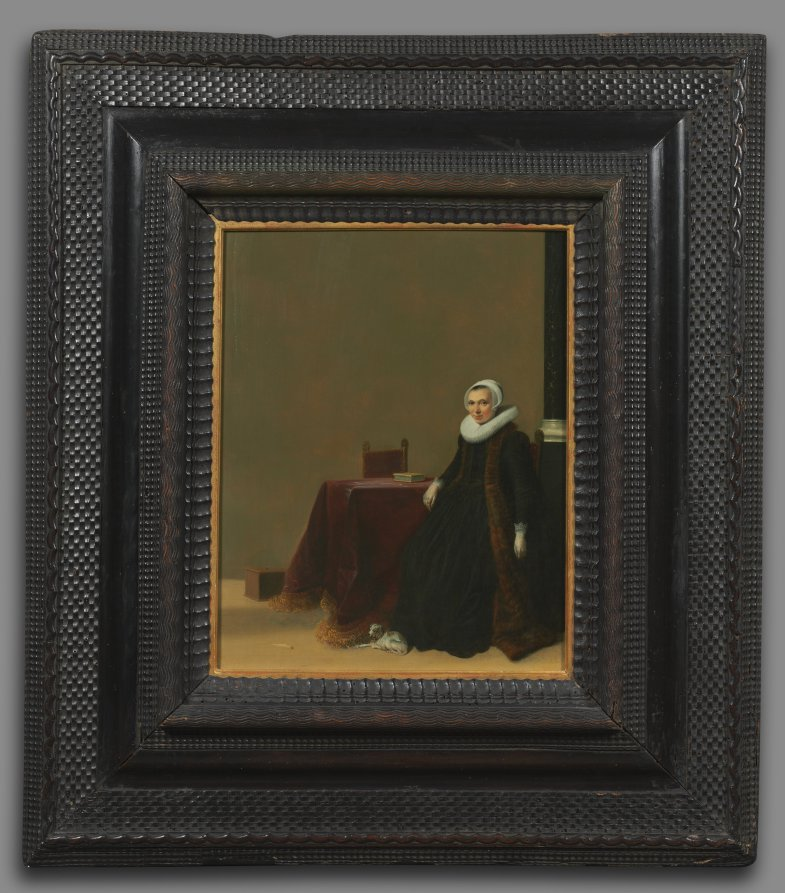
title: Portrait of a Woman with a Dog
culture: Netherlands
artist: Hendrik Gerritsz. Pot (Dutch, c. 1585–1657)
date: c. 1635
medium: oil on wood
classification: Painting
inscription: A painted dark oval appears on the reverse of the panel with the words "Galerie de San Donato," in light red paint. Another inscription can be seen (especially with IR) underneath the logo: "ripristinato da, Mno Luperini, nel 1875" (restored by Mr. Luperini in 1875).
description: The unidentified sitter wears rich black fabric and a brown fur stole, a sheer white linen cap covers her head, an elaborate starched ruff rings her neck, her sleeves finish in punto in aria lace, and a prominent gold ring with a jewel appears on her right hand. The composition, weighted heavily to the right, implies a pendant portrait, yet to identified, probably depicting her husband.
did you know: The wooden box on the floor would have held a dish of glowing coals: an early space heater!